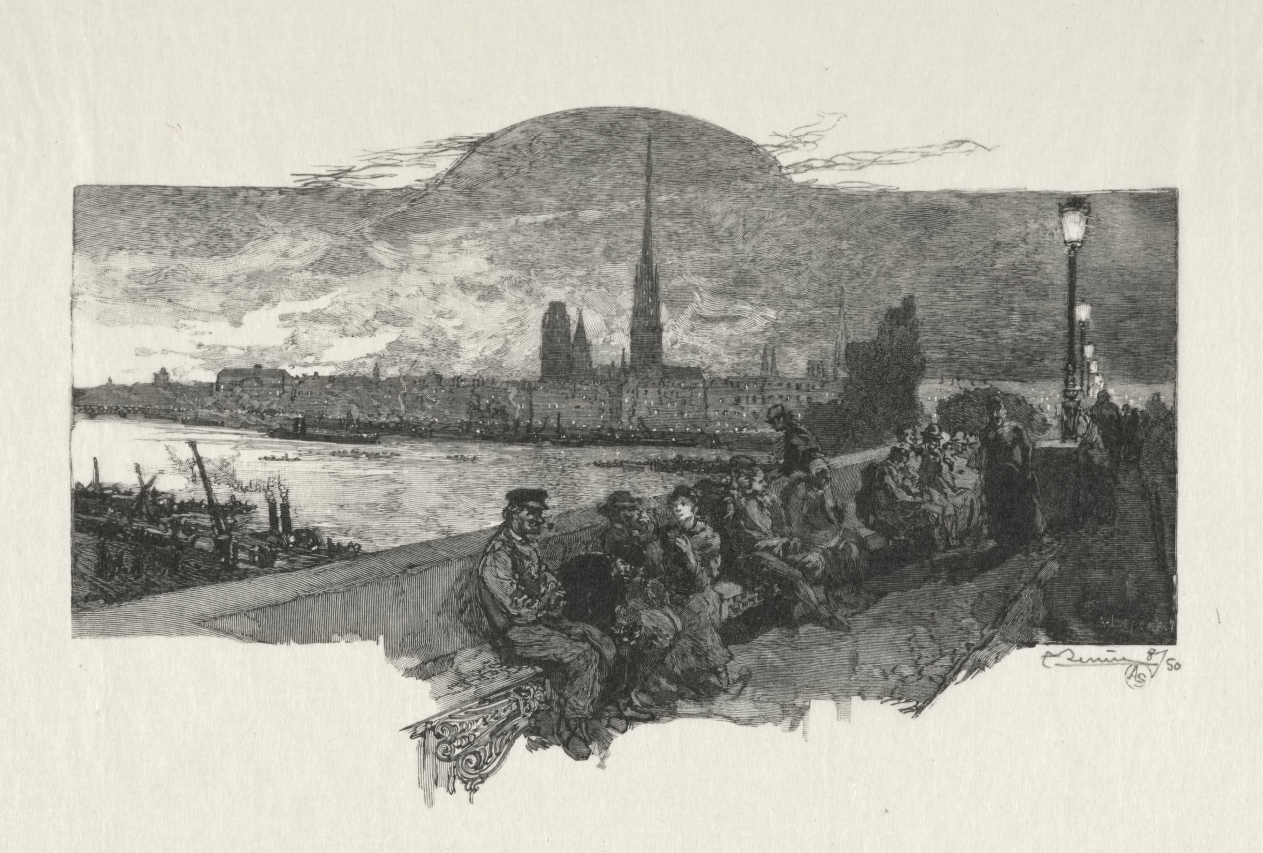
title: Le Pont de Pierres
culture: France, 19th century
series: Rouen Illustré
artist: Auguste Louis Lepère (French, 1849–1918)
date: 1896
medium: wood engraving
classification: Print